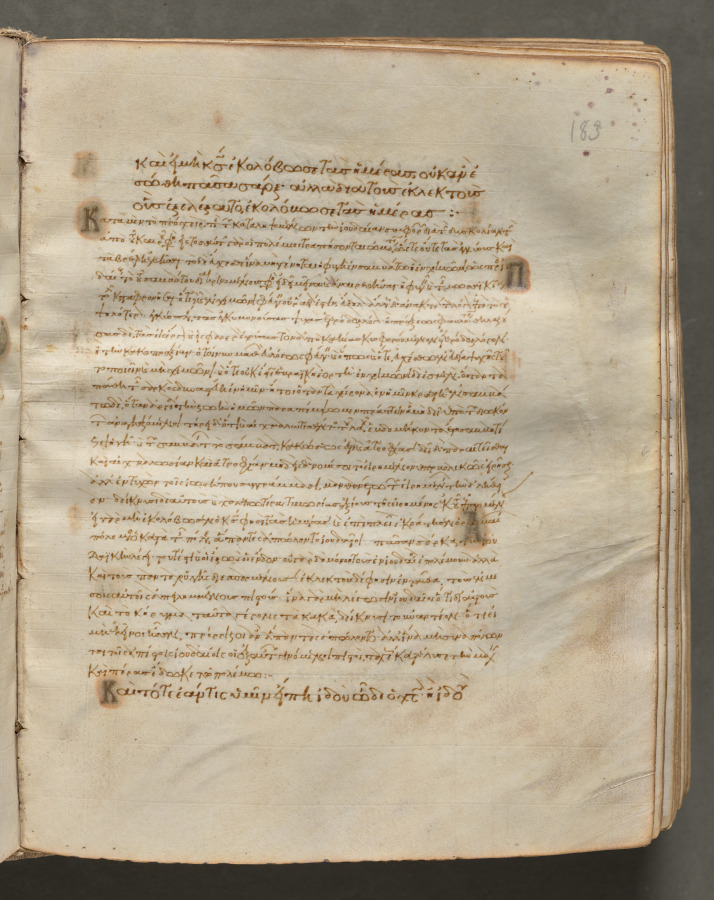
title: Text, folio 183 (recto), from a Gospel Book with Commentaries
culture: Byzantium, Constantinople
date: c. 1000–1100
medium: ink, tempera, and gold on vellum; leather binding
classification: Bound Volume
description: Each of the four gospels in this book opens on a page with brilliantly illuminated borders depicting the author of the text as well as birds-principally peacocks, symbols of the immortality of the soul-and fountains, representing the fountain of life and the salvation of the soul. This volume consists of 428 leaves with texts in Greek. Its level of sophistication suggests that it was probably written and decorated in a monastery in Constantinople.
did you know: Gospel Books were carried in procession through Byzantine churches.